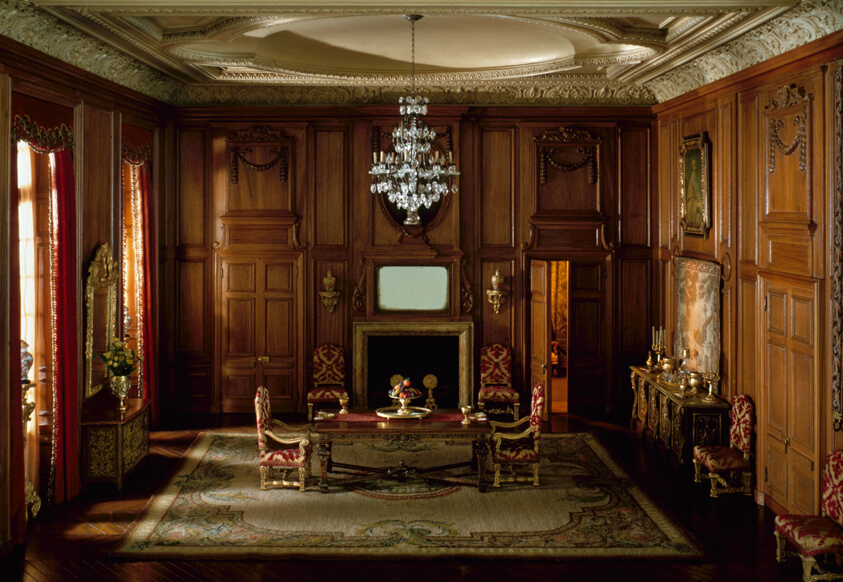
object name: Miniature room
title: E-19: French Dining Room of the Louis XIV Period, 1660-1700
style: louis xiv, european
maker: Designed by Narcissa Niblack Thorne; American, 1882-1966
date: c. 1937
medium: Miniature room, mixed media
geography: United States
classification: miniature; thorne rooms